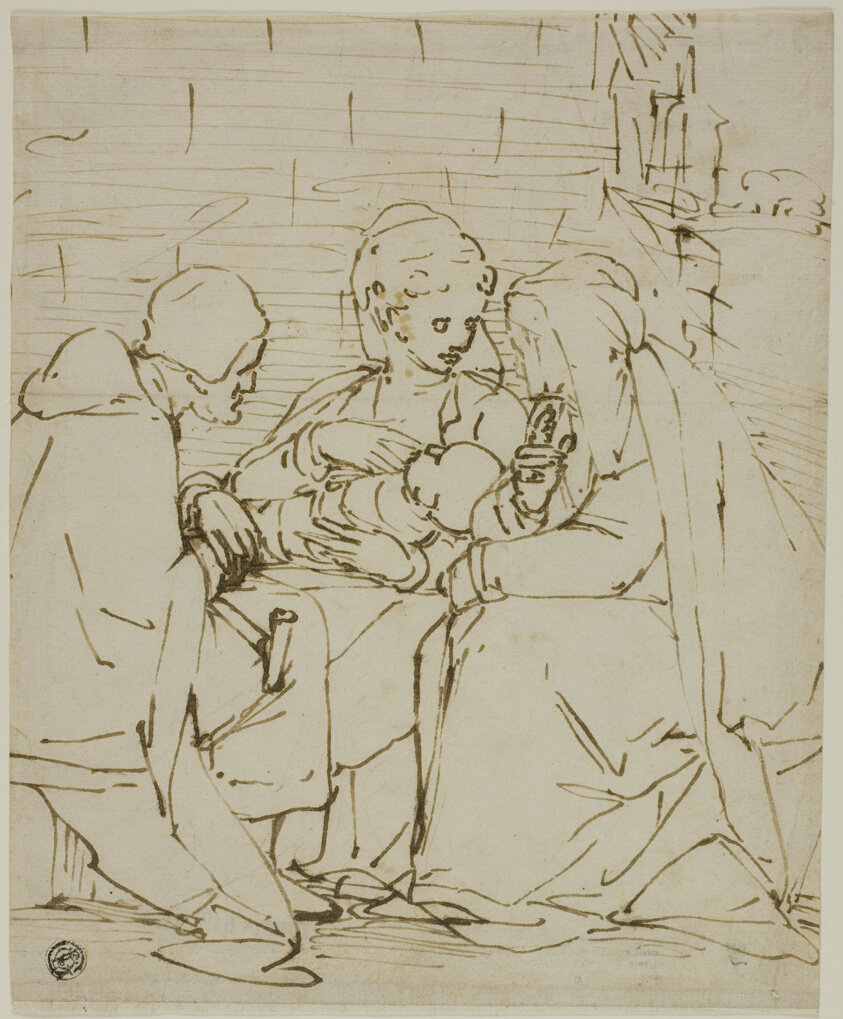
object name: Drawing and Watercolor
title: Holy Family with Saint Anne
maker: School of Luca Cambiaso (Italian, 1527-1585)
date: c. 1570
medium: Pen and brown ink on cream laid paper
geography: Italy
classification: pen and ink drawings; drawings (visual works); prints and drawing